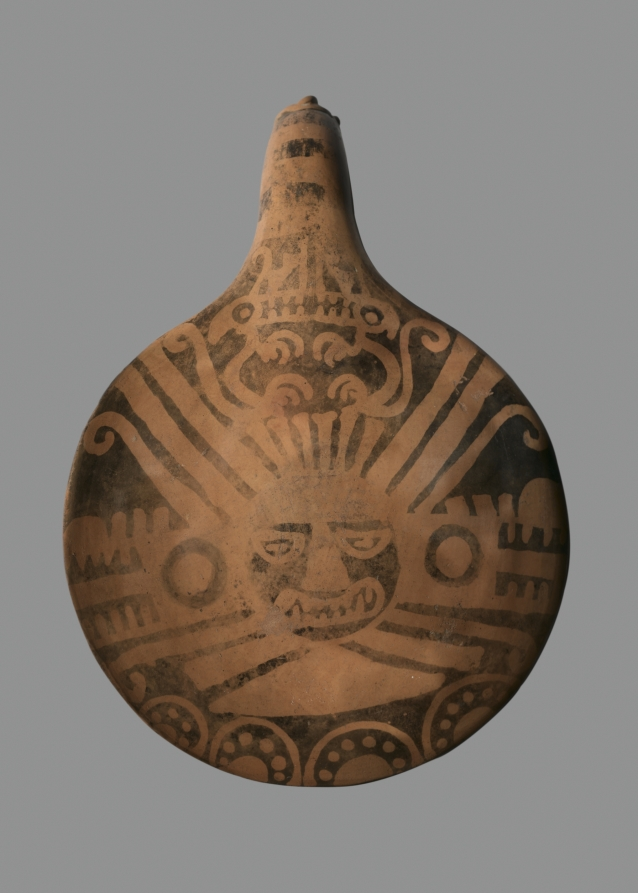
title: Dipper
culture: Peru, North Highlands, Recuay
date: 100 BCE–700 CE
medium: ceramic, slip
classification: Ceramic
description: Both of these objects feature a creature known as the "Recuay feline," although it could also refer to a fox, dog, or viscacha (a rodent). Whatever its identity, the prominent crest on its head ties it to the supernatural realm, a connection underlined by the deity head that also appears on the dipper and by the ritual function of snuff tablets, which were used to inhale hallucinogenic snuffs during religious ceremonies.